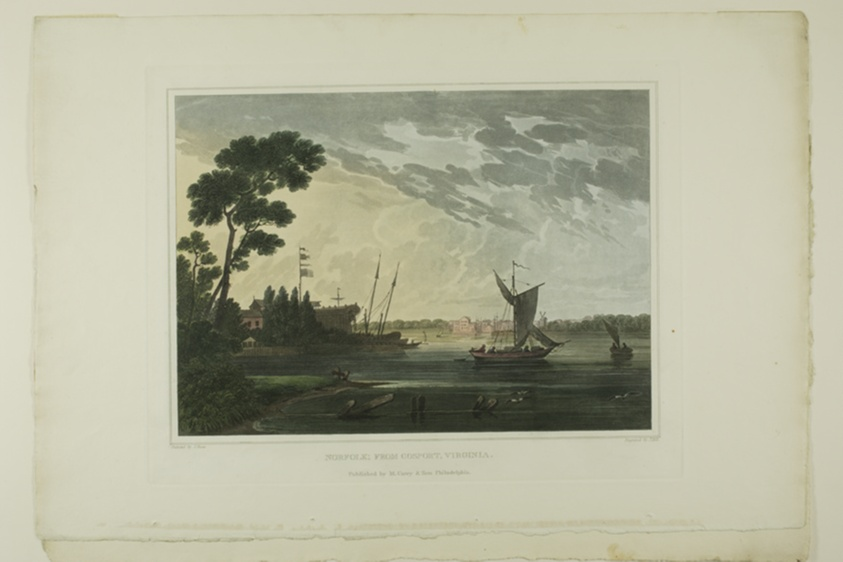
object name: Print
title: Norfolk; From Gosport, Virginia, plate five of the second number of Picturesque Views of American Scenery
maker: John Hill (American, 1770-1850); after Joshua Shaw (American, born England, c. 1777-1860); published by Matthew Carey & Son (American, active 1795-1821)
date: 1819/21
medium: Aquatint with etching and hand-coloring on cream wove paper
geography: United States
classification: aquatint; portfolio; prints and drawing; print